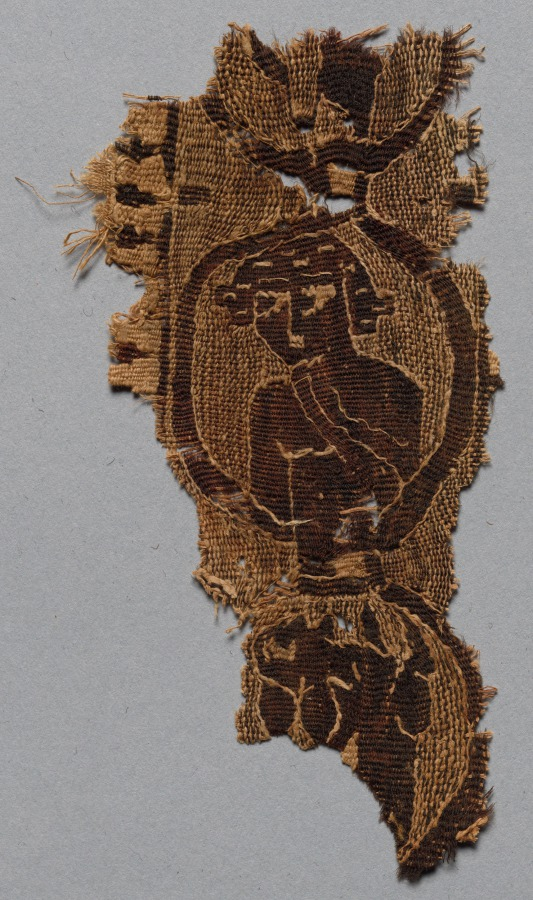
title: Clavus with Linked Roundels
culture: Egypt, Byzantine period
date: 400s - 500s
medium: tabby weave with inwoven tapestry ornament, linen and wool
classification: Textile